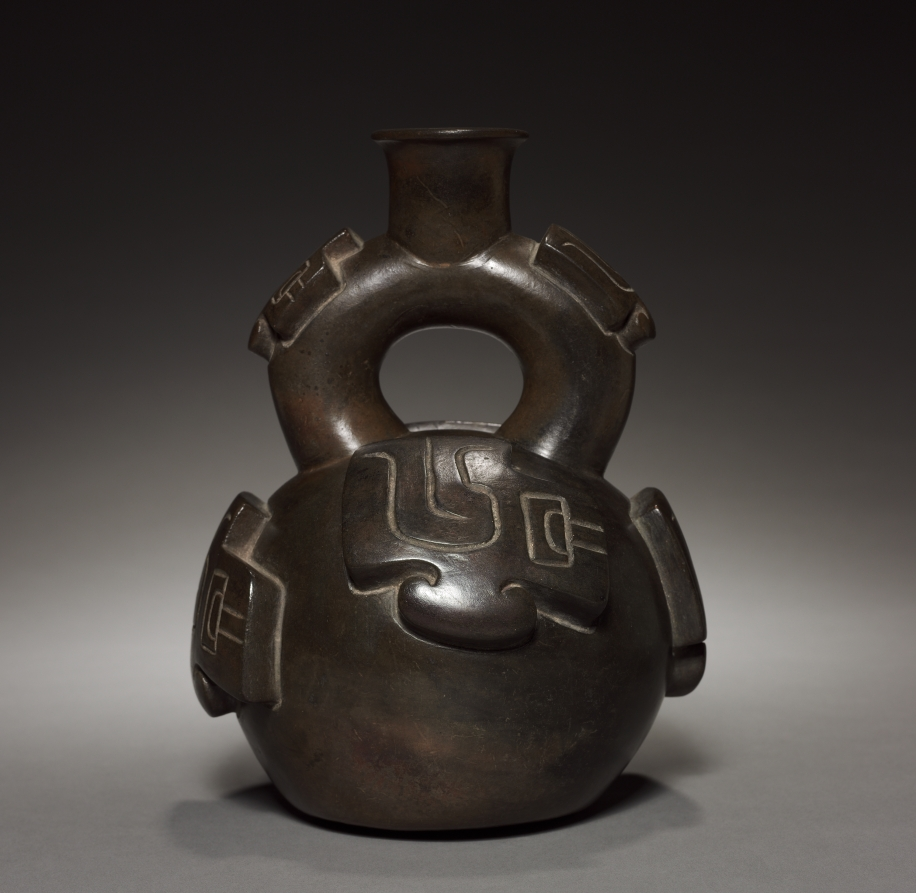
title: Vessel with Stirrup Spout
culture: Peru, likely modern, inspired by the Cupisnique style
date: 1900s (thermoluminescence date)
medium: earthenware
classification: Ceramic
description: The stirrup spout first appeared on the North Coast in the ceramics of the Cupisnique culture, a Chavín contemporary, and remained an important North Coast spout form until the time of the Spanish conquest. It probably had symbolic meaning, now lost.